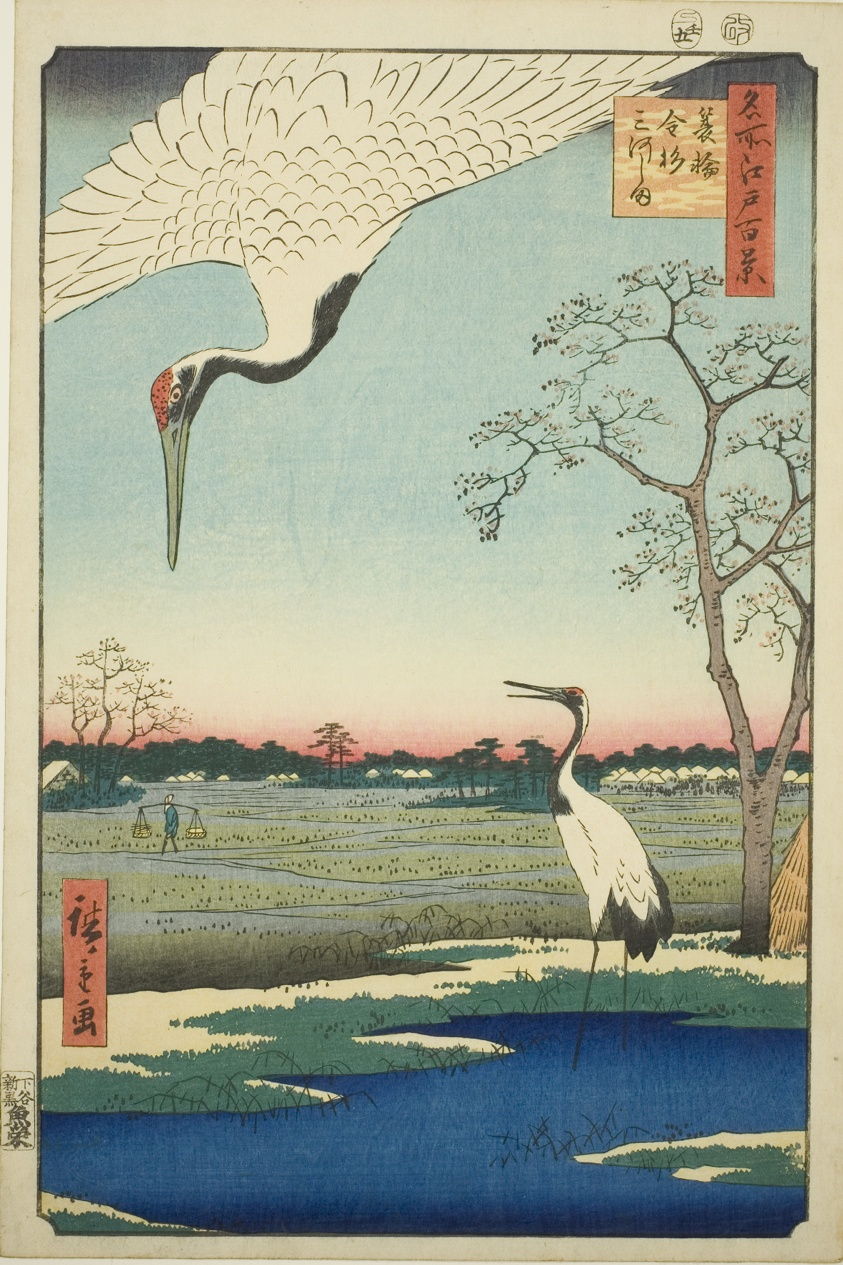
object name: Print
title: Minowa, Kanasugi, Mikawashima, from the series “One Hundred Famous Views of Edo (Meisho Edo hyakkei)”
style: Japanese (culture or style)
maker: Utagawa Hiroshige 歌川 広重; Japanese, 1797-1858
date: 1857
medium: Color woodblock print; oban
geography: Japan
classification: woodblock print; print; asian art